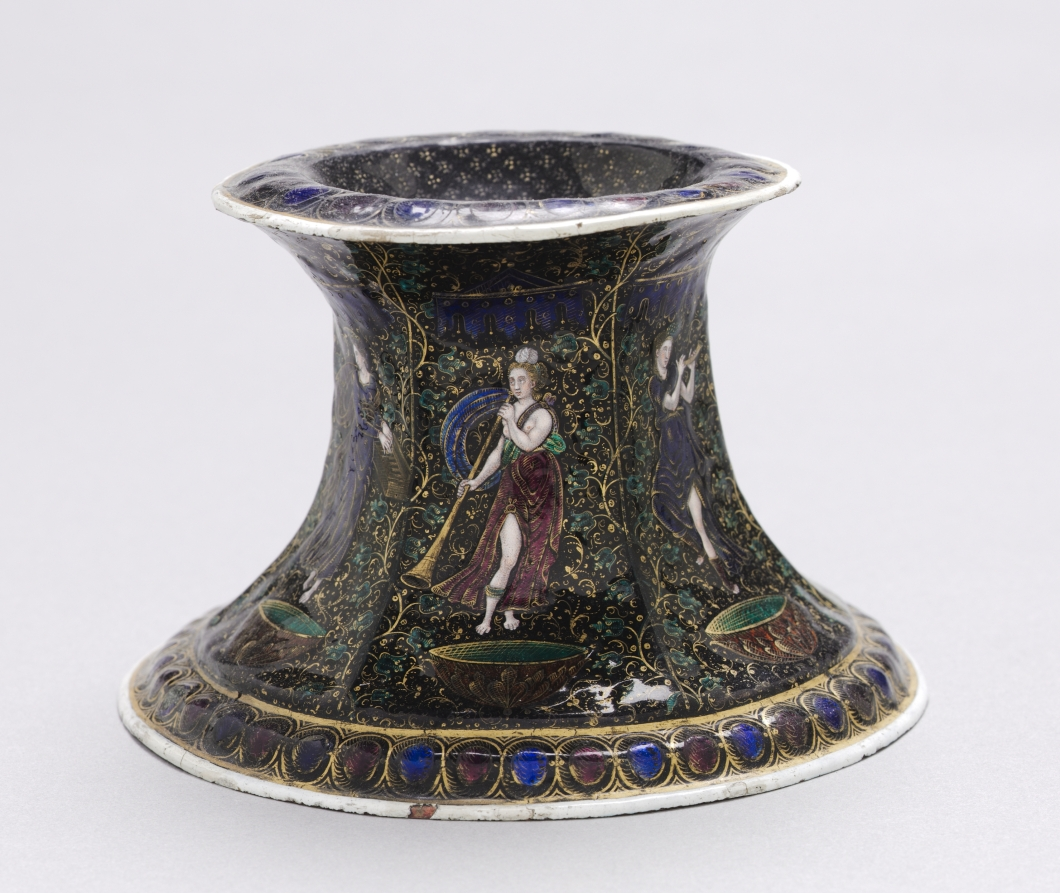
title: Salt Dish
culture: France, Limoges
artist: Jean Limousin (French, 1528–c. 1610)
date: early 1600s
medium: painted enamel on copper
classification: Ceramic